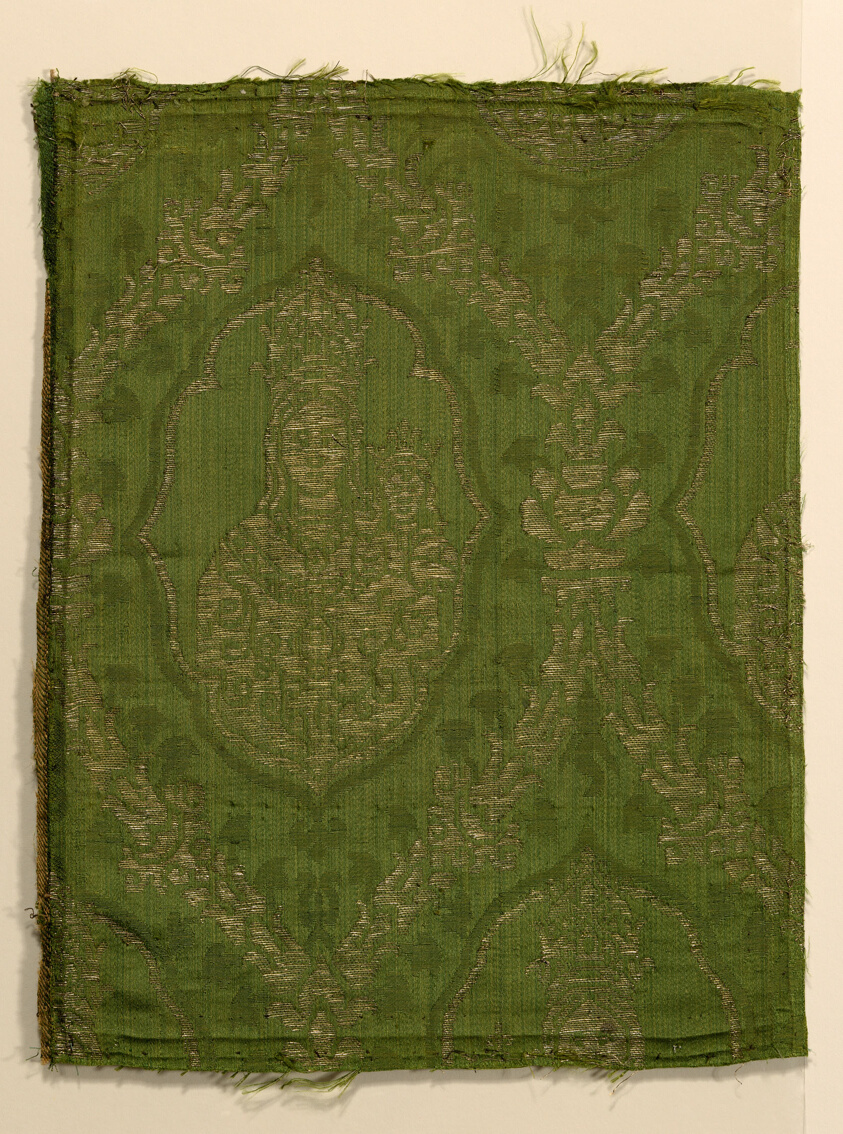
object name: Textile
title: Fragment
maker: Italy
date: 16th century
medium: Silk and gilt-metal-strip wrapped silk; 4:1 satin damask weave, supplementary brocading wefts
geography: Italy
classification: textile; weaving